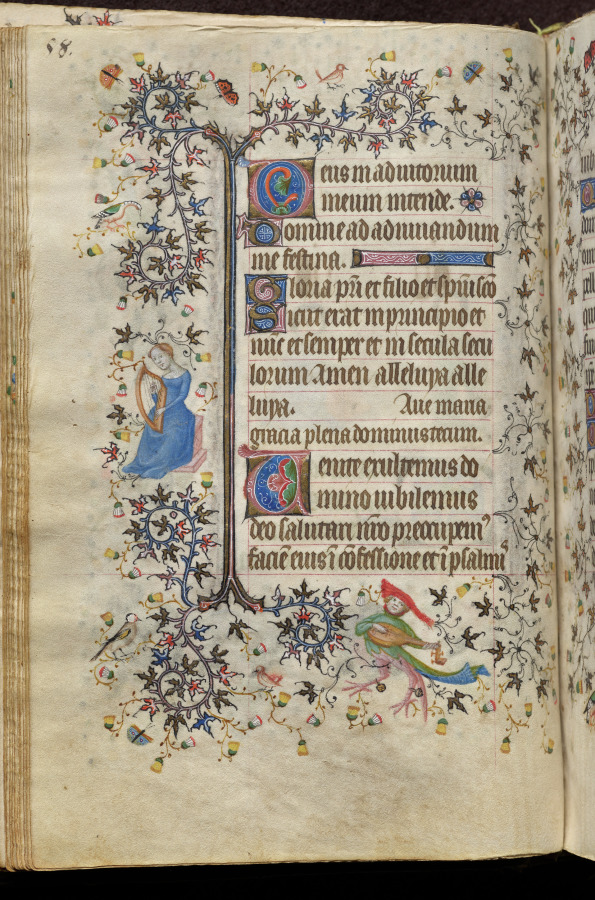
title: Hours of Charles the Noble, King of Navarre (1361-1425): fol. 29v, Text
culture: France, Paris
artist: Master of the Brussels Initials and Associates (French)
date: c. 1405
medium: ink, tempera, and gold on vellum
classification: Bound Volume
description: This precious volume was obviously highly prized by its owner, the French-born King of Navarre, who had his coat of arms painted on no less than twenty folios. Rather than directly commissioning this manuscript from a specific workshop, it seems that Charles the Noble acquired his book of hours -- perhaps ready-made for the luxury market -- while on a trip to Paris in 1404-05. A collaborative effort, six painting styles are evidenced within the pages of this codex, those of two Italians, two Frenchmen, and two Netherlanders. The painter who was responsible for the planning and decoration of the book, and who produced seventeen of the large miniatures, was a Bolognese artist known as the Master of the Brussels Initials. His principal assistant, responsible for most of the borders, was a Florentine who signed his name "Zecho" da Firenze on folio 208 verso.